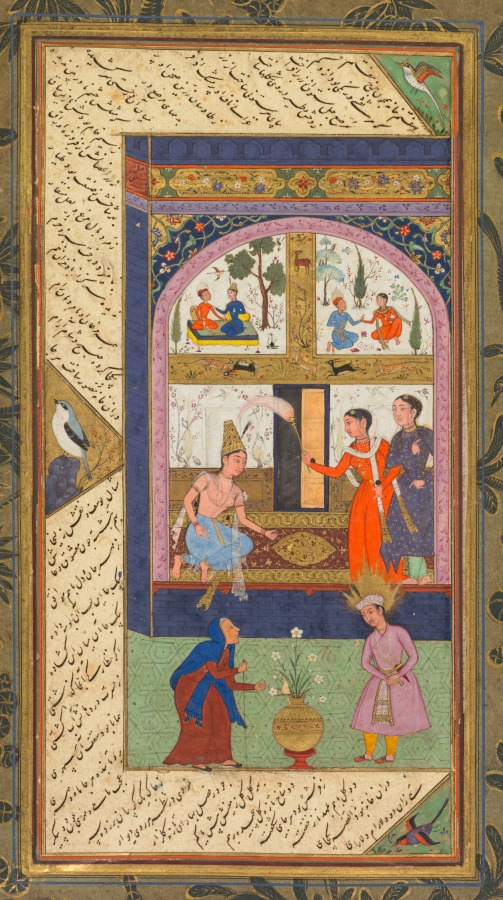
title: Zulaykha in her palace and as an old woman with Joseph, from a Panj Ganj (Five Treasures) of Abd al-Rahman Jami (Persian, 1414–1492); verso from a Panj Ganj of Abd al-Rahman Jami (Persian, 1414–1492), with two masnavis: Yusuf va Zulaykha (Joseph and Zulaykha) and Khirad-nama-i Iskandari (Alexander’s Book of Wisdom)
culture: Western Afghanistan, Herat (text); Mughal India (paintings)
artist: Mushfiq (Indian, active early 1600s)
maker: Sultan 'Ali al-Mashadi (Iranian, 1430–1520)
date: Text copied by Sultan-Ali Mashhadi (Persian, 1453–1520) for Badi al-Zaman Mirza of Herat Painting, borders, and illumination by Mushfiq (Indian, active 1580s–early 1600s); Text copied in Herat; Painting, borders, and illuminations made in the Deccan for Mughal minister Abd al-Rahim the Khan Khanan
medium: Gum tempera, ink, and gold on paper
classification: Painting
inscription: the miniature signed at upper left: ' amal - i Mushfiq sana 1015 (the work of the Mushfiq year 1015) Text on verso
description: The recto of this album leaf illustrates two episodes from the story of Joseph and Zulaykha. In the first, Zulaykha awaits Joseph in the house she has built for them. She has painted the walls with romantic scenes and dressed herself alluringly with the intention of seducing him. The artist has discreetly inserted his name and the painting’s date in a brick of the house at the upper left. The virtuous Joseph, with flaming halo and eternally youthful features, rejects the married woman’s advances, but many years later, when Zulaykha is an elderly widow, they are reunited. In the second episode we see the aged Zulaykha meeting Joseph. His prayers will restore her to youthful beauty, and the two will finally be joined as lovers. The section of text on the verso from Jami’s poem of Joseph and Zulaykha, written diagonally in the margins, describes the beauties of Zulaykha’s house, in which she intends to seduce Joseph. It includes the following verses: Jeweled lamps on the walls were hung; And odorous herbs were beneath them flung. She gathered together all things most fair, And unrolled the carpet of pleasure there. But amid the charms of the sumptuous hall She longed only for Joseph, far dearer than all. A heavenly palace is dark and dim To a lover whose darling is far from him. The longing of Zulaykha for Joseph metaphorically describes an imperfect devotee’s mystical love for God. With patience, forbearance, and virtuous actions, unification with the divine will eventually occur, even for the most flawed among us. On this page also begins the Khirad-nama-i Iskandari (Alexander’s Book of Wisdom), another of the fivenarrative poems that make up the Panj Ganj.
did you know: A cheetah caught the buck, as Zulaykha hoped to catch Joseph.